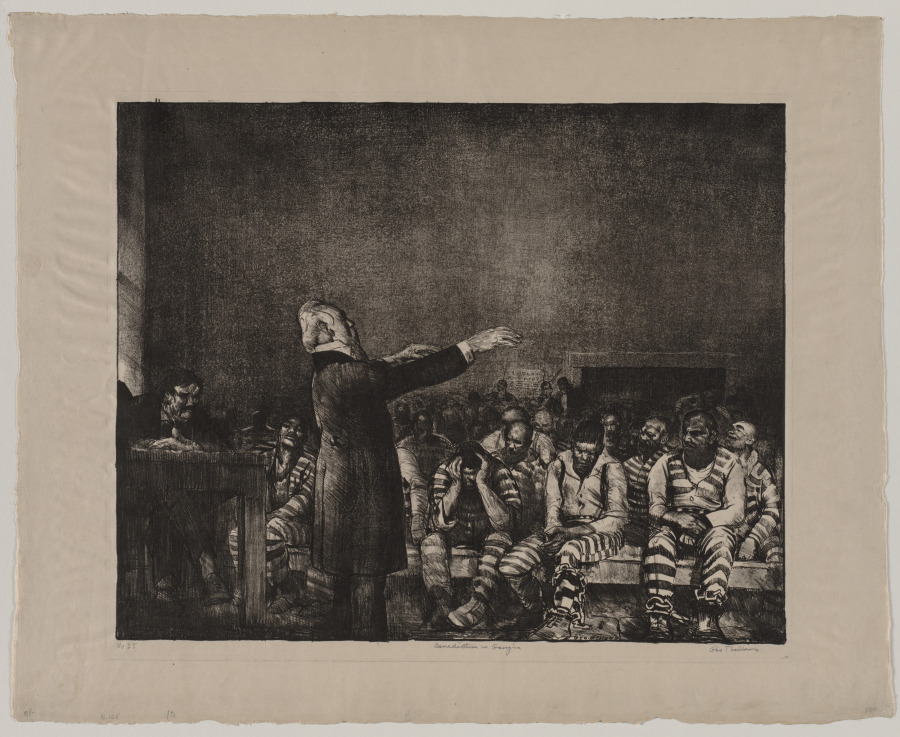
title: Benediction in Georgia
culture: America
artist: George Bellows (American, 1882–1925)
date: 1916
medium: lithograph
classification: Print